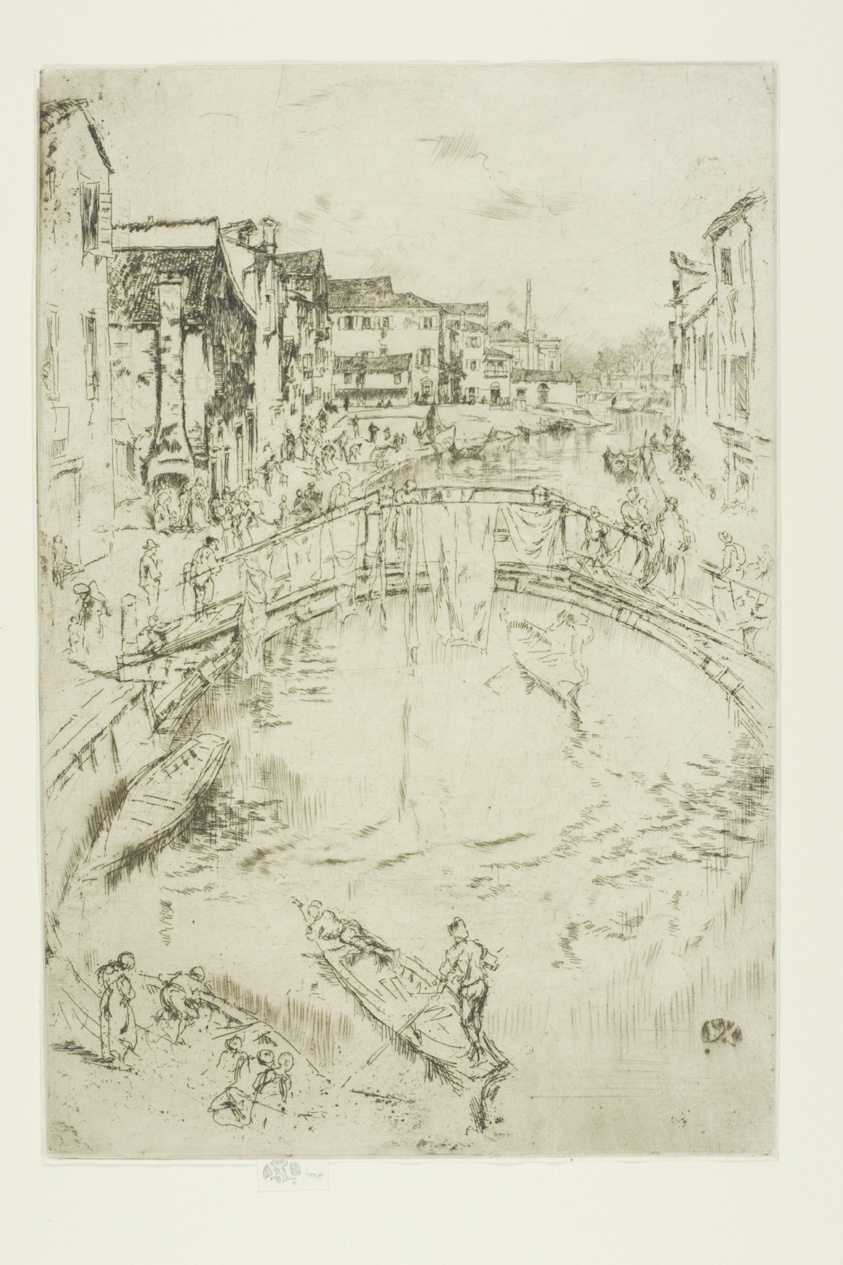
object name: Print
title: The Bridge, Santa Marta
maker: James McNeill Whistler (American, 1834-1903)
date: 1879/80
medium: Etching and drypoint with foul biting in black ink on off-white laid paper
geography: United States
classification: etching; foul biting; drypoint; print; prints and drawing; paper